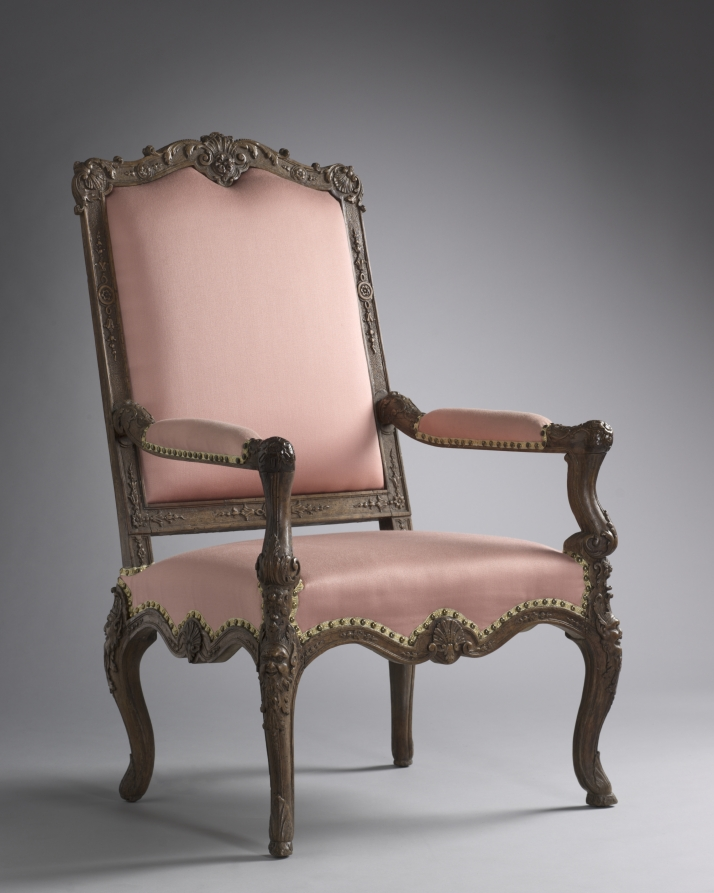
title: Armchair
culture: France, 18th century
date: c. 1715–1723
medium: oak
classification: Furniture and woodwork